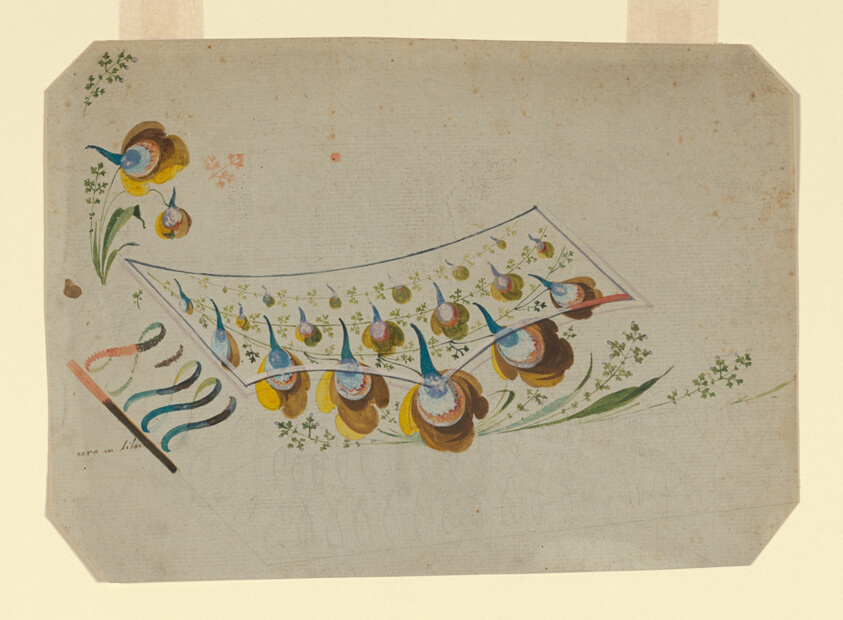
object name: Drawing and Watercolor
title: Design for an Embroidered Waistcoat Pocket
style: 18th Century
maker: France, probably Lyon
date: 1780-90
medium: Opaque and translucent watercolor over graphite on green laid paper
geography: France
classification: textile; accessory - paper design; accessories (object genre)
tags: arabesque, foliage, floral motifs, flowers